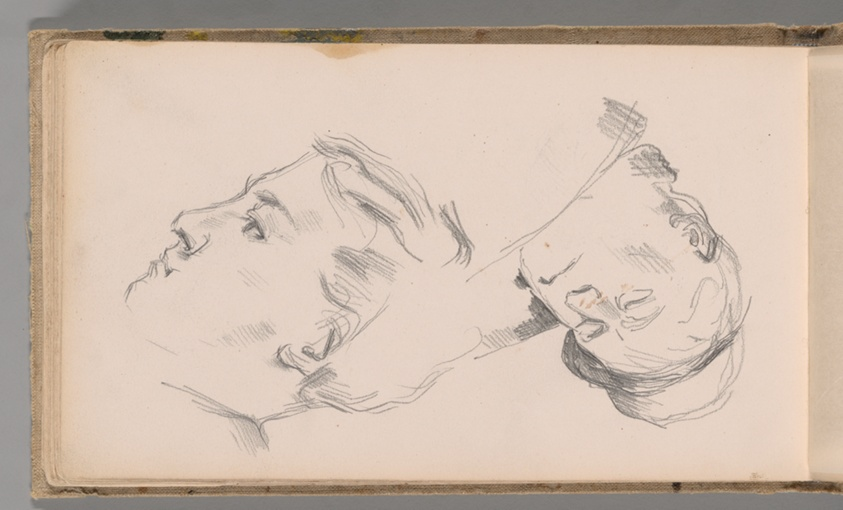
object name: Drawing and Watercolor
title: Sketchbook No. 2 (L'Estaque)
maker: Paul Cézanne; French, 1839-1906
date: 1875–86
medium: Graphite and pen and ink drawings on paper, bound into a book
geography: France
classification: sketchbook; graphite; prints and drawing; paper